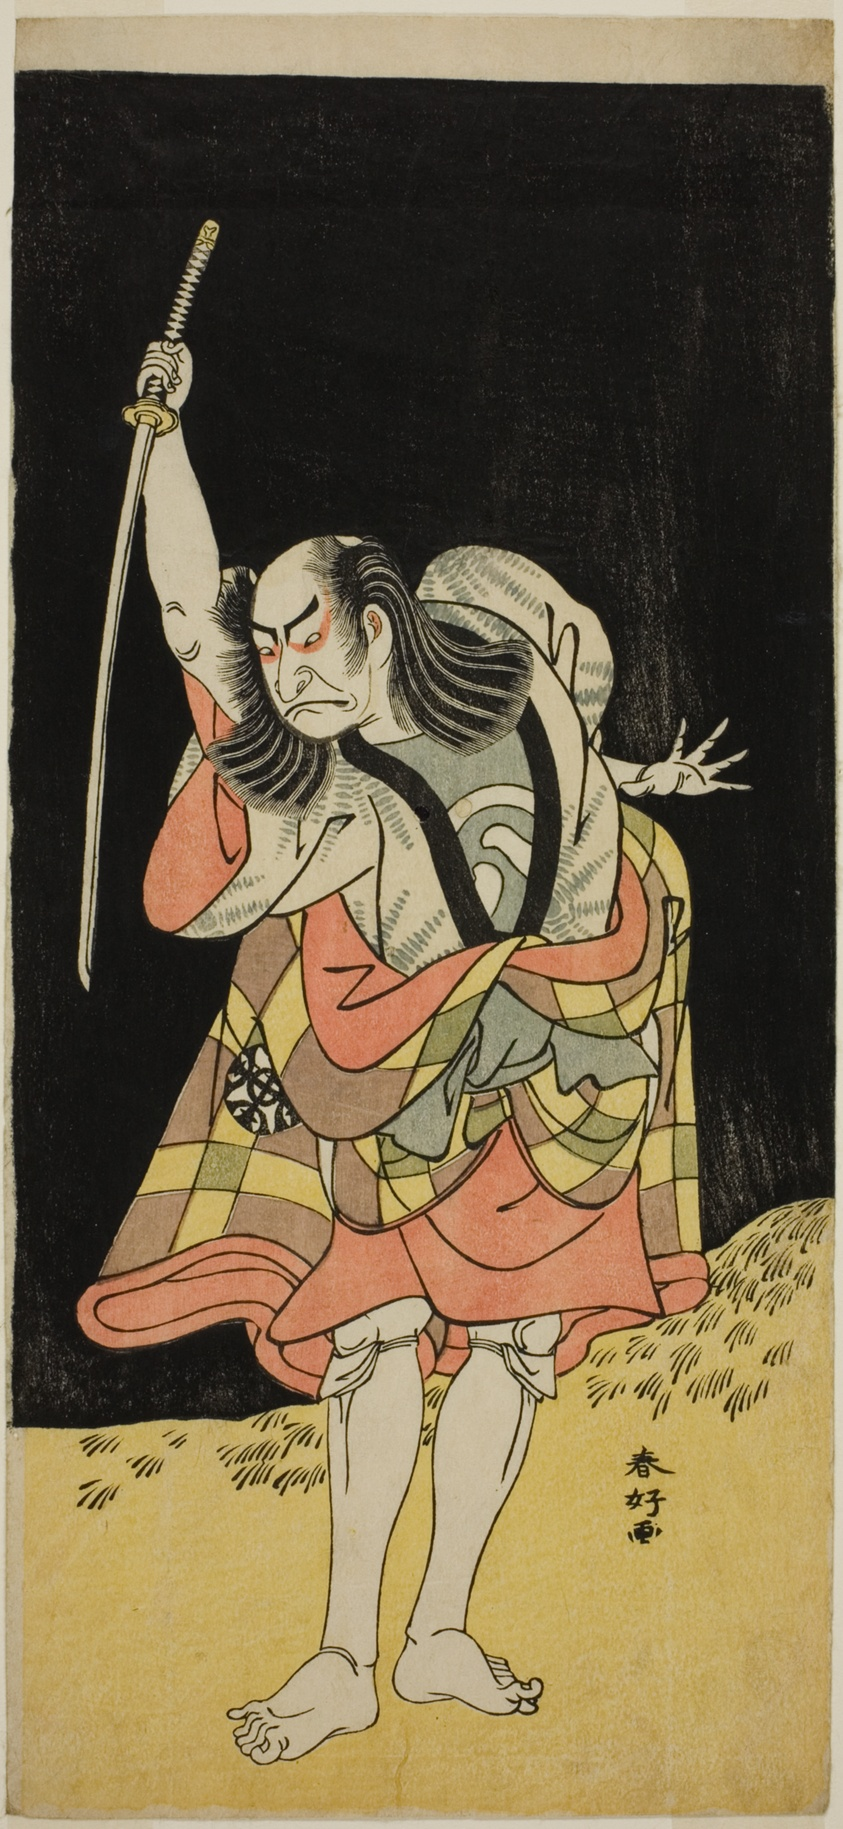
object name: Print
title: The Actor Nakamura Nakazo I as Ippei (?) in the Play Koi Nyobo Somewake Tazuna (?), Performed at the Ichimura Theater (?) in the Eighth Month, 1778 (?)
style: Japanese (culture or style)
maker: Katsukawa Shunko I; Japanese, 1743-1812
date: c. 1778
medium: Color woodblock print; hosoban; right sheet of diptych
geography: Japan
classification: woodblock print; print; asian art